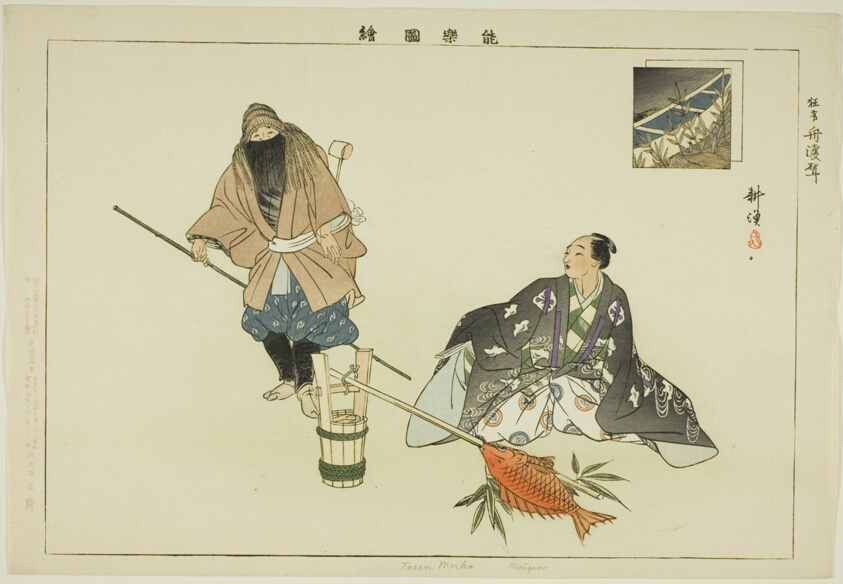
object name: Print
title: Tosen Muko (Kyogen), from the series "Pictures of No Performances (Nogaku Zue)"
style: Japanese (culture or style)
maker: Tsukioka Kogyo; Japanese, 1869-1927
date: 1898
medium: Color woodblock print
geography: Japan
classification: woodblock print; print; asian art